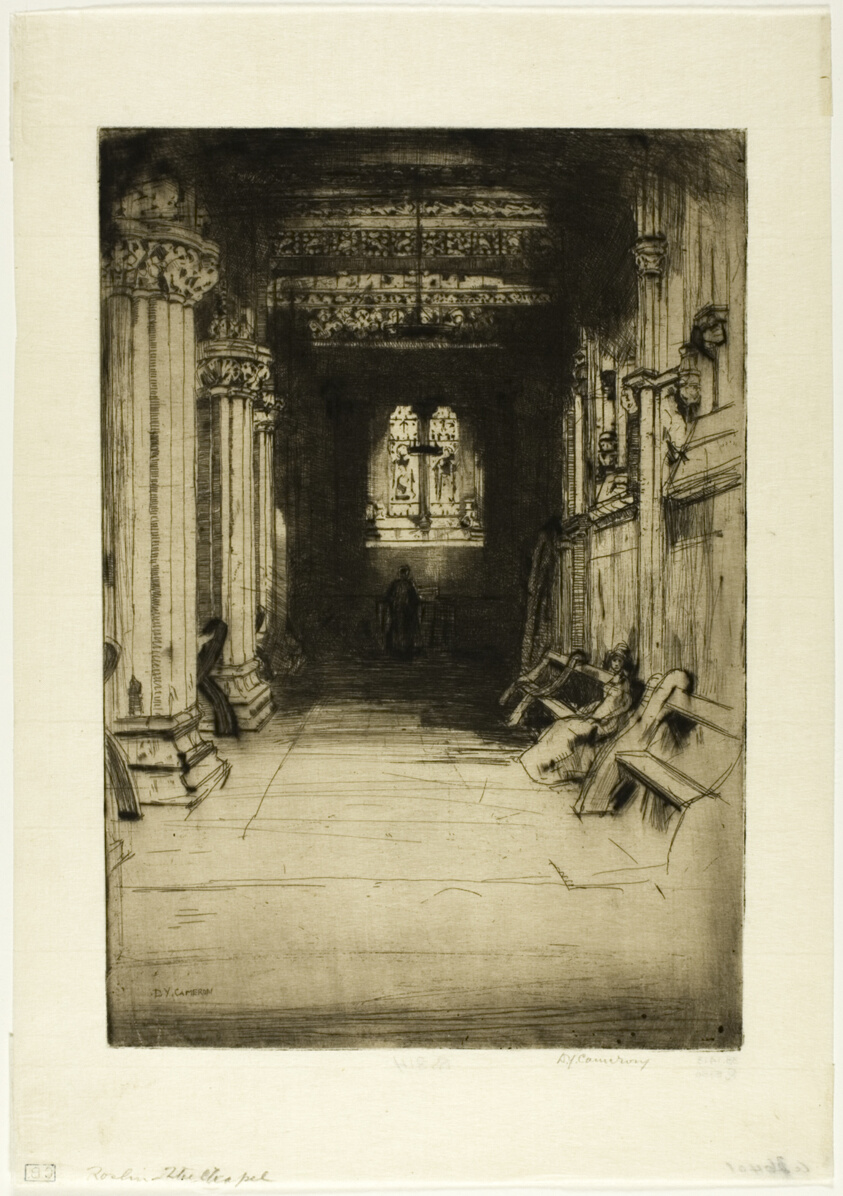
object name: Print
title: Rosslyn Chapel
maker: David Young Cameron (Scottish, 1865-1945)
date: 1901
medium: Etching and drypoint on ivory laid paper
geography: Scotland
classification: etching; print; prints and drawing